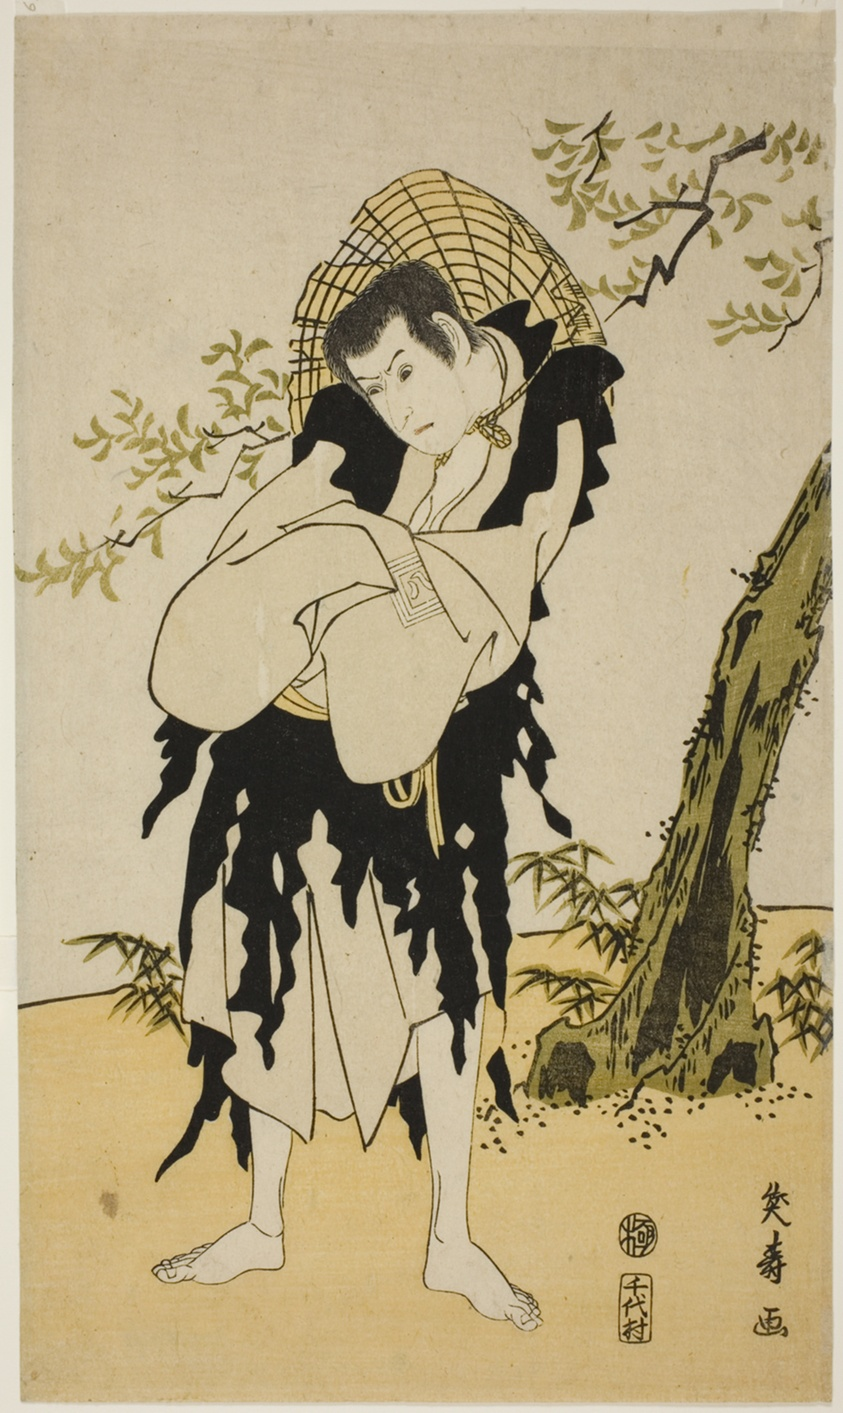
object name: Print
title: Actor Ichikawa Yaozo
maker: Chotensai Eiju (Japanese, active about 1790)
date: about 1785–1790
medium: Color woodblock print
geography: Japan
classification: woodblock print; print; asian art